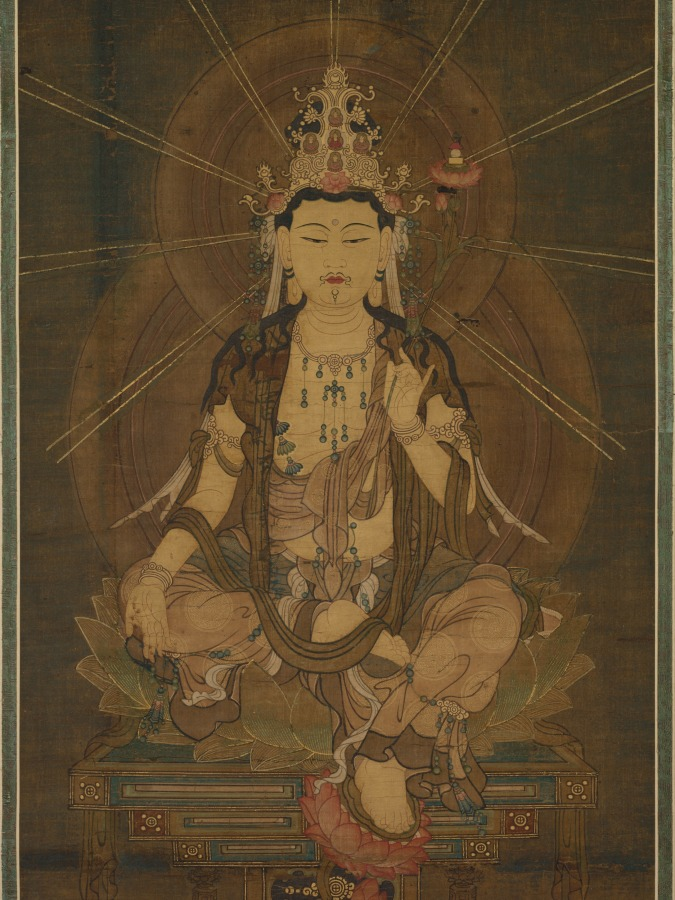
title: Miroku (Maitreya)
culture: Japan, Nanbokuchō period (1336–92)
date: 1300s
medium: Hanging scroll, ink, color, gold, and cut gold on silk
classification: Painting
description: In this image the figure of Miroku, Maitreya in Sanskrit, is richly adorned with gauzy fabrics, opulent jewels, and an intricate gold crown containing five seated Buddhas. Buddhist teachings say that Miroku will descend to Earth as a Buddha to restore Buddhist doctrine at the end of a long period of decline. Here he is represented as a bodhisattva, a being who has attained enlightenment but has chosen to postpone becoming a Buddha to help others reach enlightenment. Above the painting, three inscriptions present portions of a sacred text related to Miroku. A close look at the bodhisattva’s right side where fragile pigments have fallen away reveals writing on the back of the silk on which the image is painted— something its mounters never expected to be seen.